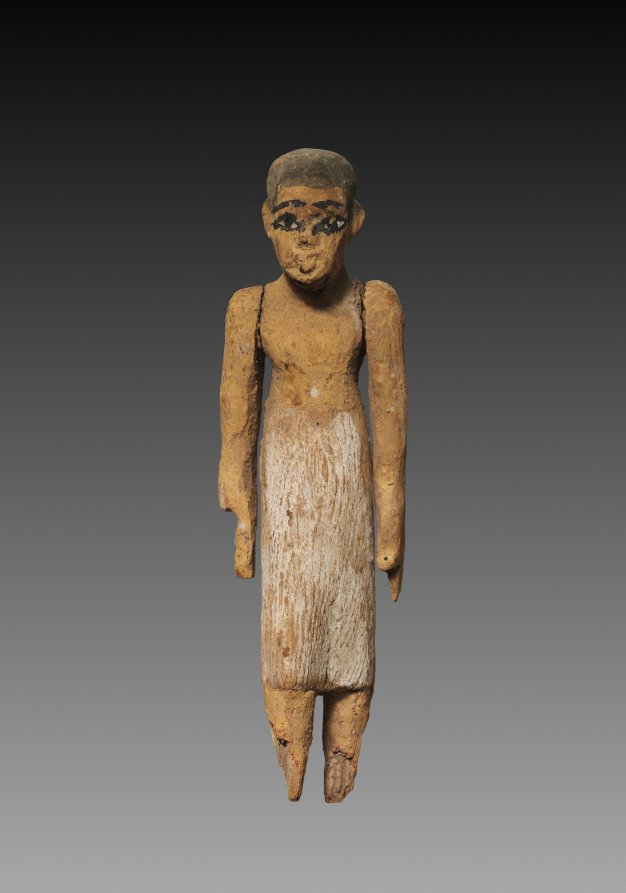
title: Model Figure of a Man, Perhaps a Boat Attendant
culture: Egypt, perhaps Meir, Middle Kingdom (2040–1648 BCE)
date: 2040–1648 BCE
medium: painted sycamore fig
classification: Funerary Equipment